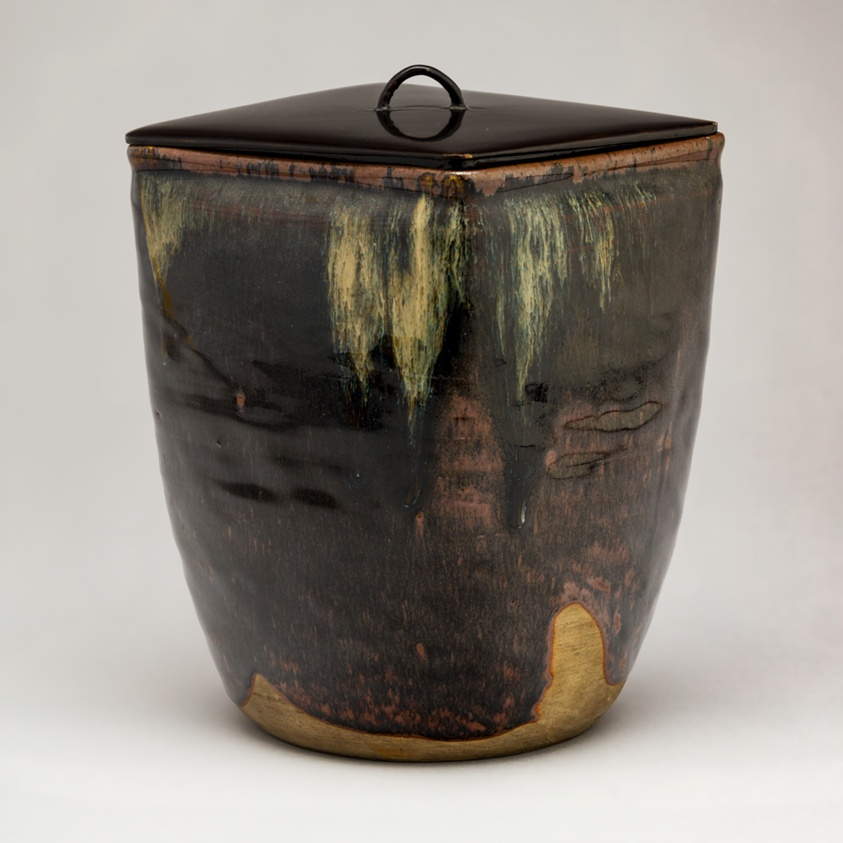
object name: Vessel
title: Takatori Ware Water Jar (Mizusashi)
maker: Artist unknown; Japanese, active 19th century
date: 19th century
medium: Glazed stoneware with lacquer lid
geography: Japan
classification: ceramics; asian art; vessel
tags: tea